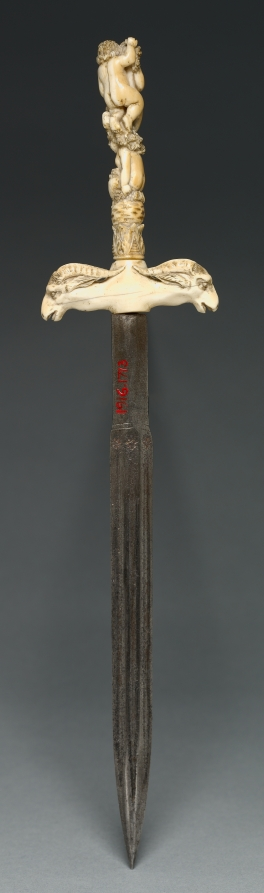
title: Dagger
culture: Italy, late 17th Century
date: late 1600s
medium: steel and ivory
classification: Arms and Armor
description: The carved grip of this dagger depicts the female followers of Bacchus, the Roman god of wine.